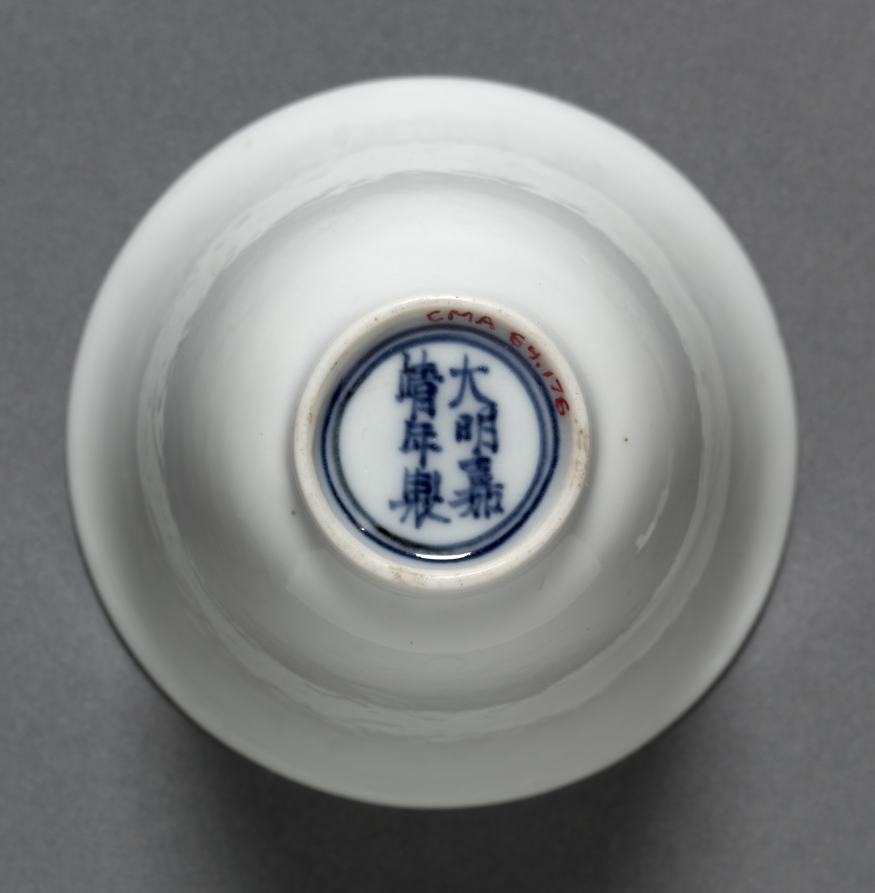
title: Cup with Dragon and Clouds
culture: China, Jiangxi province, Jingdezhen kilns, Ming dynasty (1368-1644), Jiajing mark and reign (1522-66)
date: 1522–66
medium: porcelain with incised decoration and white glaze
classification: Ceramic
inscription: 大明嘉靖年製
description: In the Ming dynasty (1368–1644), luxury items became more affordable to larger parts of the society, including women, merchants, and literati in non-official positions. Imperial patronage and a growing urban population encouraged consumption of luxury goods and local craftmanship. This small white bell-shaped cup illustrates the advanced porcelain techniques and the creative mind of the talented artisan who sought clients on a competitive market.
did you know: This cup is incised with a "secret" decoration of clouds and dragons.